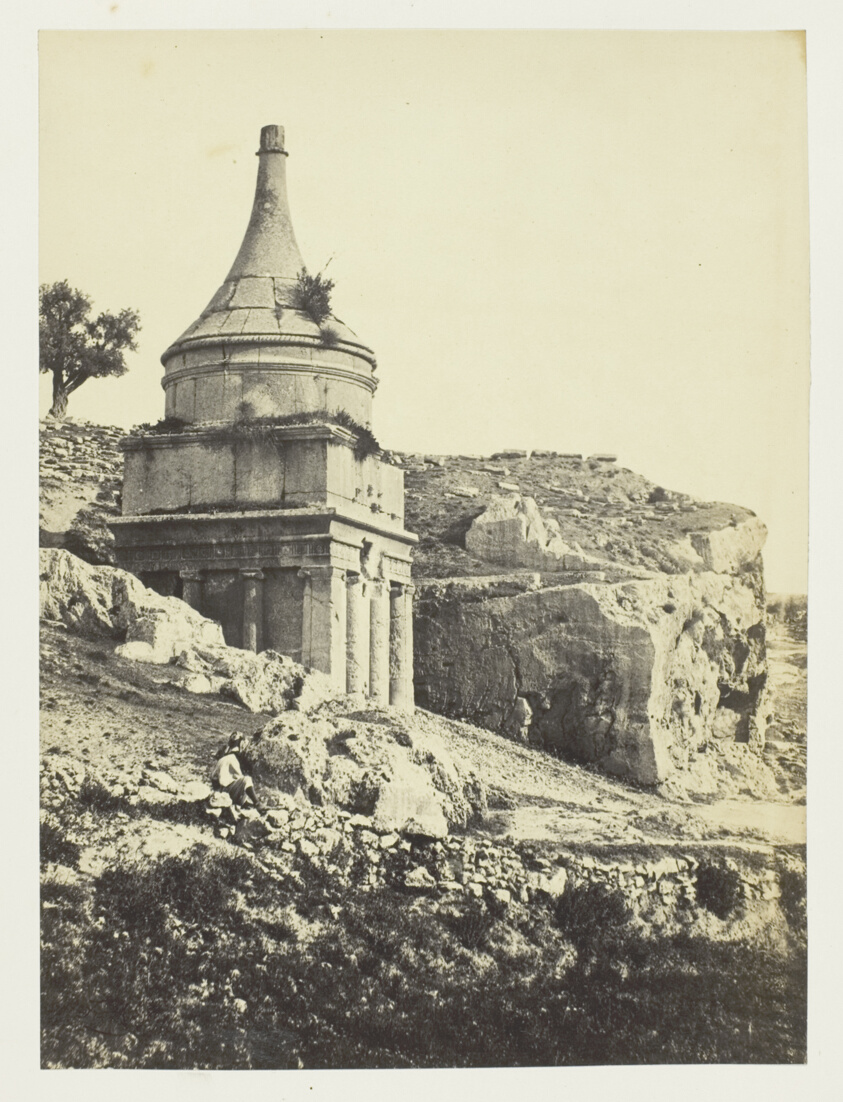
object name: Photograph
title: Absalom's Tomb, Jerusalem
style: 19th century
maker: Francis Frith (English, 1822–1898)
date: 1857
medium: Albumen print, pl. 27 from the album "Egypt and Palestine, Volume II" (1858/60)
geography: England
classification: albumen silver print; photographic process; photography; photograph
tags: Collected by Hugh Edwards, Egypt and Palestine